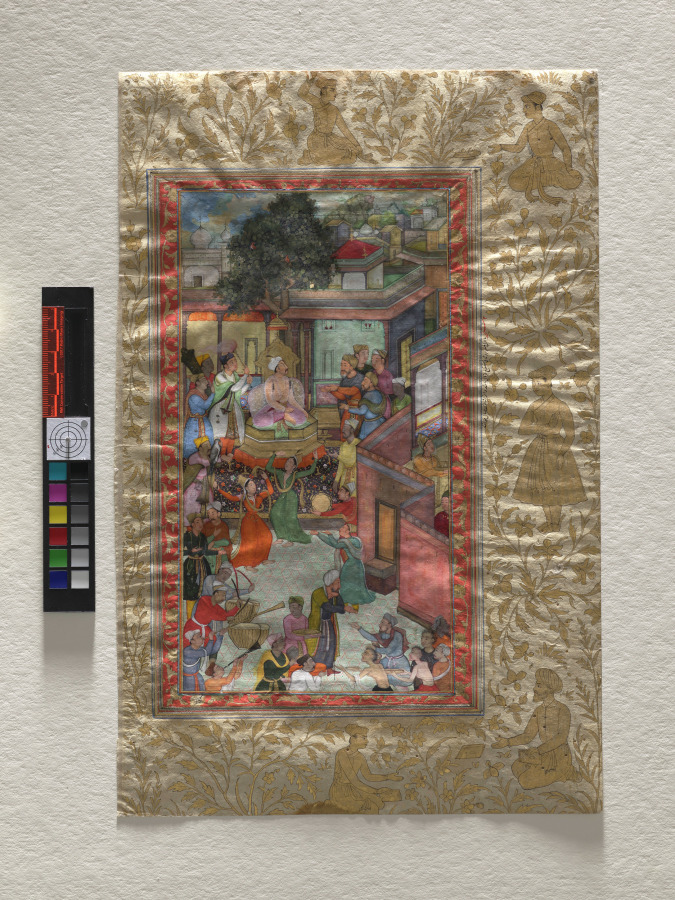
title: Circumcision ceremony for Akbar’s sons, painting 126 from an Akbar-nama (Book of Akbar) of Abu’l Fazl (Indian, 1551–1602)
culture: Mughal India, court of Akbar (reigned 1556–1605)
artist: attributed to Dharam Das (Indian, active c. 1580–1605)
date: c. 1602–3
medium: gum tempera, ink, and gold on paper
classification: Painting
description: This page is from a copy of the biography of Akbar that was completed not long before his death in 1605. It depicts him much younger, during the festivities held on October 22, 1573, in his newly built capital city of Fatehpur Sikri, near Agra, on the occasion of the circumcision ceremony for his three young sons. Dancers in Chaghatai Turkish dress perform as Akbar’s weight in gold is being distributed to the poor. Akbar wears a simple white tunic, or jama, stained at the armpits by aromatic musk. A curved dagger in a red velvet sheath is tucked into his golden sash, and he is crowned with a white crested turban.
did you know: An attendant strokes Akbar’s hunting falcon, perched on a glove.